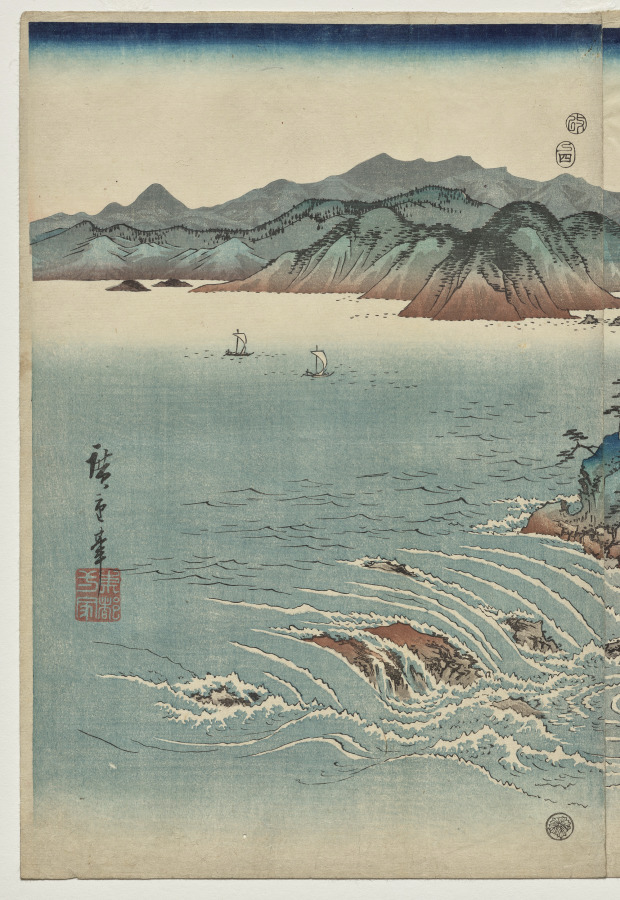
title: The Whirlpools of Awa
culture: Japan, Edo period (1615–1868)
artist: Utagawa Hiroshige (Japanese, 1797–1858)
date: 1857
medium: One of a triptych of color woodblock prints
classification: Print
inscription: Signature: Hiroshige hitsu (on left panel) Publisher: Okazawaya Taheiji (emblem) Censorship Seal: aratame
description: Late in his career, Hiroshige explored the poetic theme of setsugekka, “snow, moon, and flowers,” in a set of three triptychs. The swirling whirlpools at Awa would remind the viewer of flowers.